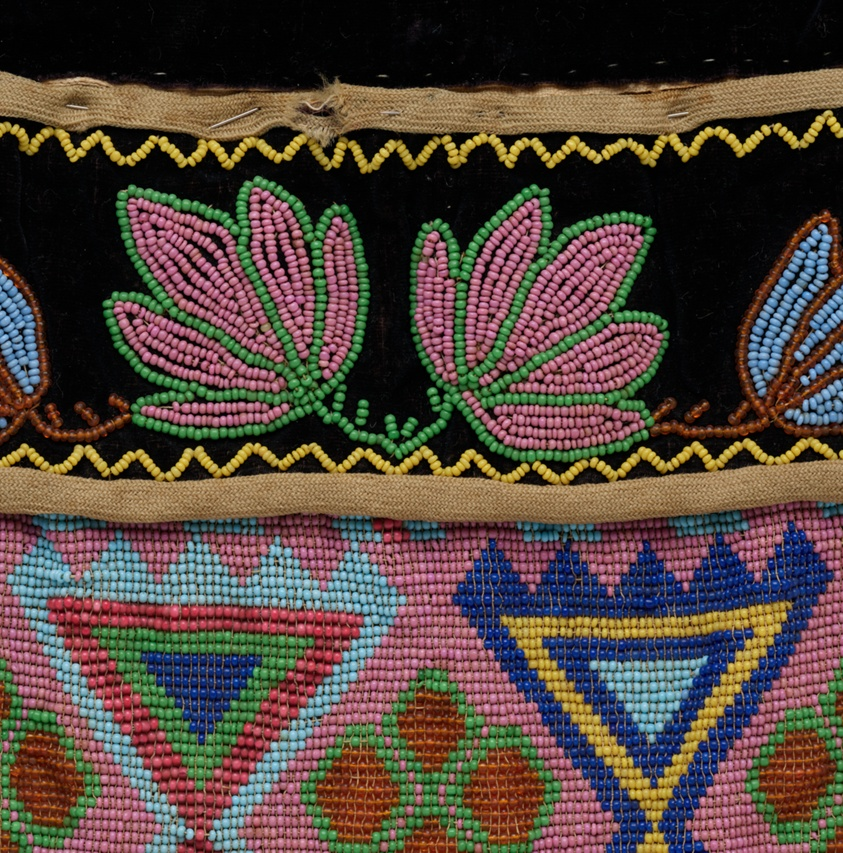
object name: Costume and Accessories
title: Man's Shoulder Bag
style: potawatomi, native american, americas, Arts of the Americas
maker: Maker unknown (Potawatomi); Great Lakes region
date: Mid–late 19th century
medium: Cotton, velvet, yarn, and glass seed beads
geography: Great Lakes Region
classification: beadwork; costume accessory; costume; art of the americas